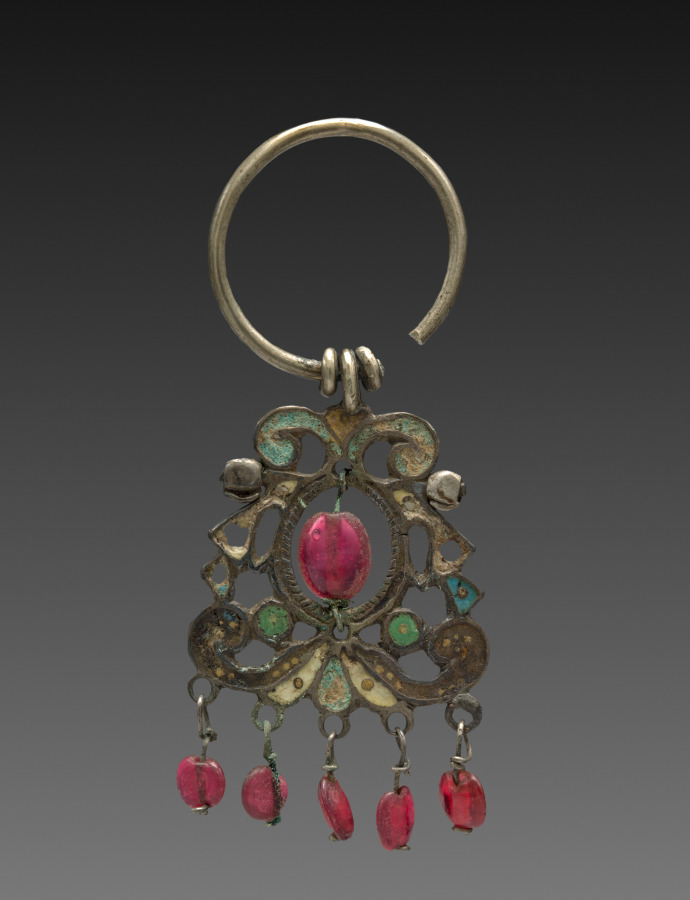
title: Earring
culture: Russia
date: 1800s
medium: silver, enamel, and red glass beads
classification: Jewelry